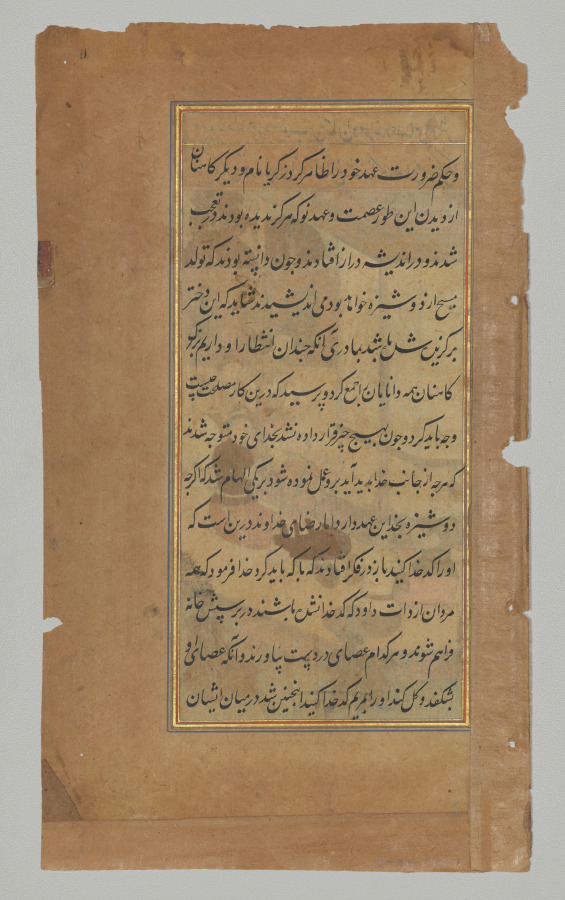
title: Text, Folio 11 (recto), from a Mirror of Holiness (Mir’at al-quds) of Father Jerome Xavier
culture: Mughal India, Allahabad, made for Prince Salim (1569–1627)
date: 1602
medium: Ink and gold on paper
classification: Manuscript